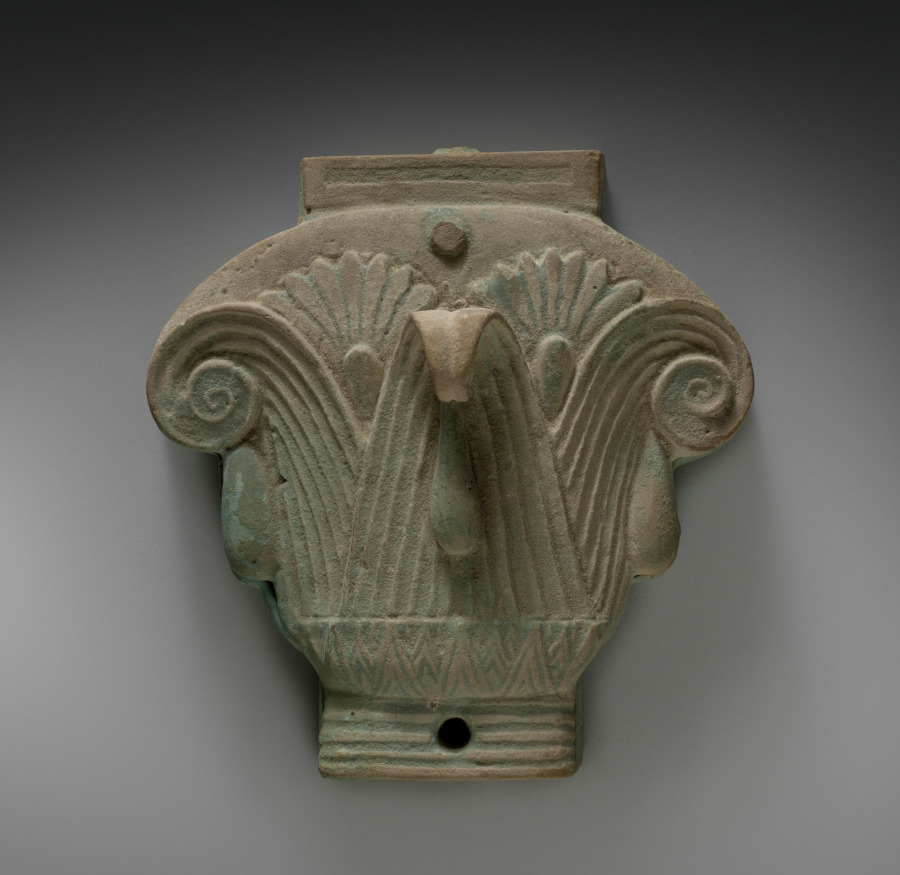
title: Box (Pyxis) in the Form of a Composite Capital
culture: Egypt, Greco-Roman period (332 BCE–395 CE), Ptolemaic dynasty (305–30 BCE)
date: 305–30 BCE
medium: pale robin's-egg blue faience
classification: Vessels